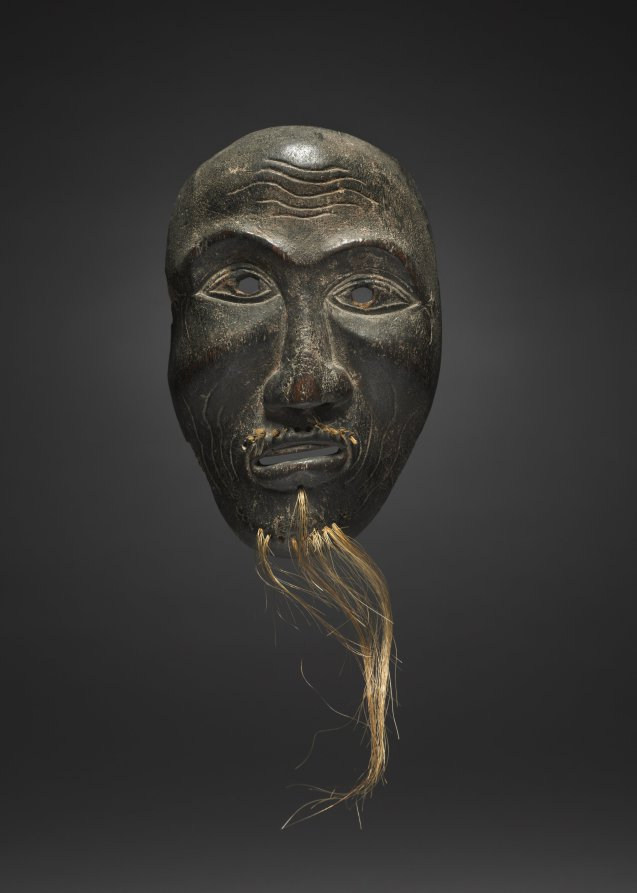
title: Mask of an Elder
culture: Korea, Joseon dynasty (1392–1910)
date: 1800s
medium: wood with horsehair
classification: Wood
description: The traditional Korean mask dance is a form of drama featuring the wearing of masks such as this one, singing and dancing. It was originally a regional term only applied to mask dances traditional to Hwanghae Province. During the Joseon dynasty (1392–1910), the dance rose to popularity among villagers as a means of self-expression and liberation, often criticizing injustice of society. Talchum: The Traditional Mask Dance of South Korea South Korea offers a vast array of experiences that are both dynamic and reverent to its rich ancient heritage. With 5,000 years of fascinating history and culture, we offer you the opportunity to encounter Talchum, a traditional mask dance-drama that captures the essence of its Shamanic beliefs in various regions throughout centuries.﻿ ﻿ Talchum is a traditional Korean mask dance drama. Literally translated to “mask dance,” it displays the people’s close connection with village communities, which had long been the basis of Korean culture and tradition. ﻿ ﻿ Talchum was derived from Shamanic rituals to pray for abundant harvest, peace, prosperity, and protection against evil spirits. As civilization developed, masks gradually evolved from sacred objects used in shamanism to becoming forms of entertainment and expression.In the Joseon period (1392–1910), the dance rose to popularity among villagers as a means of self-expression and liberation. Talchum signified the spirit of the oppressed through dance. These masked performances told stories that criticized an unjust society or ruling class, and expressed the people’s desire for a reformed world. The main themes of Talchum include, first, a ritual to drive away evil spirits; second, ridicule of apostate Buddhist monks; third, insult the hypocrisy of noblemen; and fourth, tragedy arising from conflict among spouses and the joys or sorrows of everyday life.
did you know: This wooden mask may have been worn by a dancer who performed an elderly figure for outdoor theatrical dance.